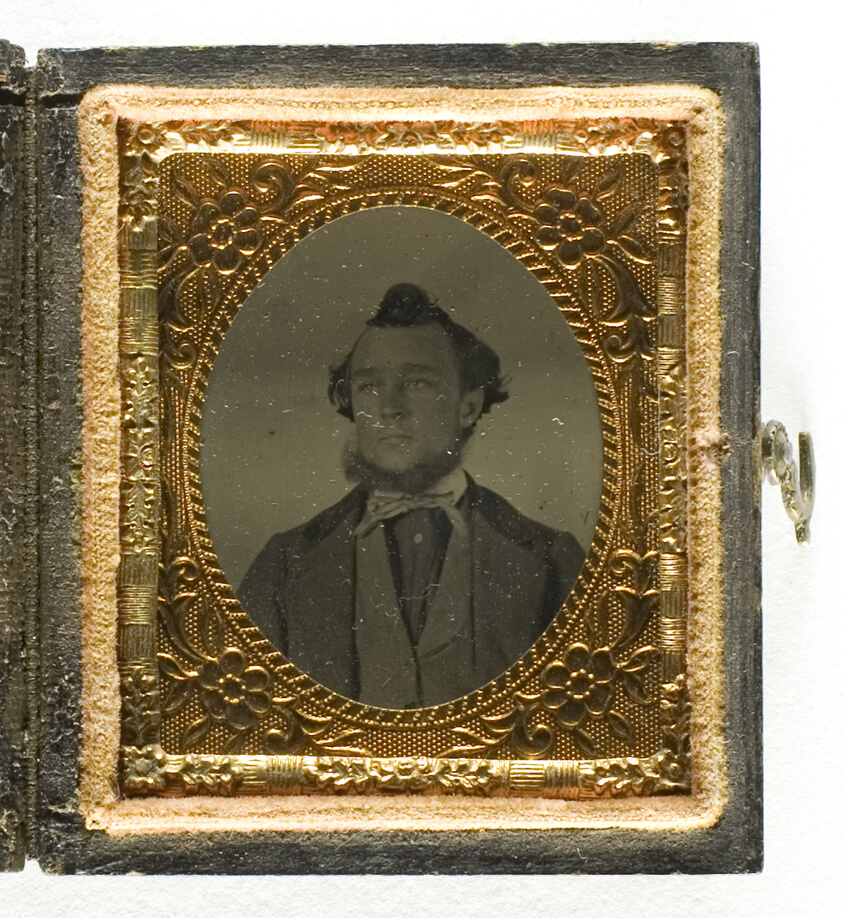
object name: Photograph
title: Untitled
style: 19th century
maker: Artist unknown; 19th century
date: 1855/75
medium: Tintype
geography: Unknown Place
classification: daguerreotype; photographic process; photography; photograph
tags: portraits, portraits: male subject, photography